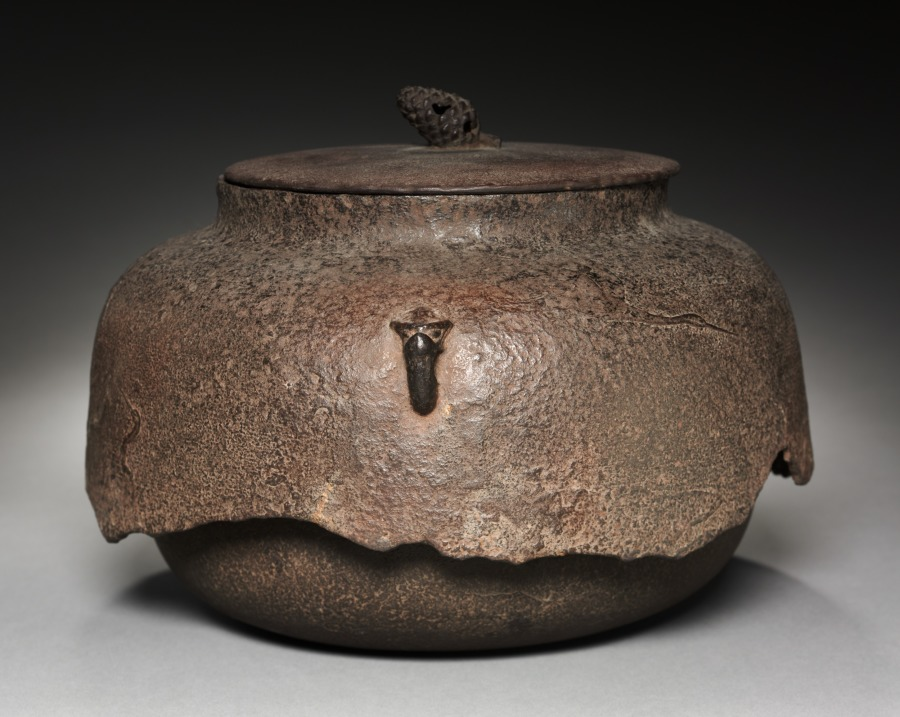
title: Kettle with Crane Design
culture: Japan, Muromachi period (1392–1573)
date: 1392–1573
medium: iron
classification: Metalwork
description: Water supplied from a jar such as the fine Shino-ware vessel (CMA 1972.9.a-b) was transferred to an iron kettle for boiling as part of the tea ceremony. Former CMA director Sherman Lee described the jagged, broken skirt of this kettle as "attractively damaged," complementing the unobtrusive wispy designs on its rough metal surface. The character of this kettle—worn, coarse, the "perfection" of symmetry destroyed—was cherished by tea masters for its powerful humility.